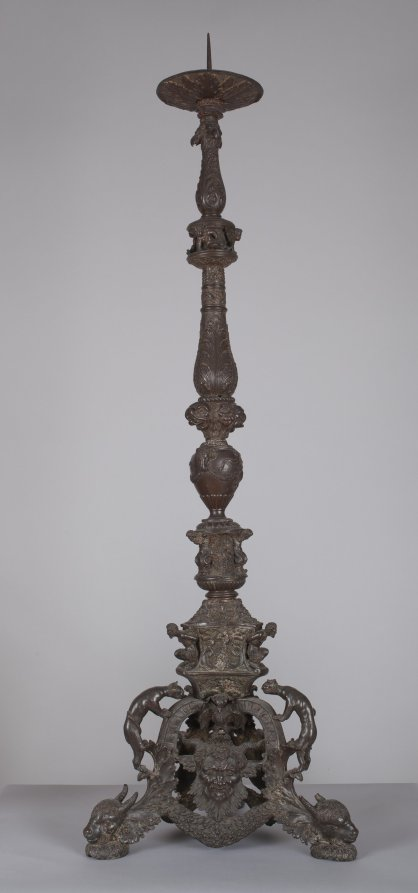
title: Paschal Candlestick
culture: Northern Italy, possibly Padua, 16th century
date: c. 1525–1550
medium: bronze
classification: Sculpture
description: In Roman Catholic practice, a large candlestick holds the Paschal Candle, blessed and lit for the first time on Easter eve, then used on significant occasions throughout the year. Despite its religious function, the decorations here are entirely secular-ranging from panthers and bound satyrs to the heads of raptors and goats. These elements derive from ancient Roman sculpture and were especially popular among intellectuals in northern Italy, who were actively exploring connections among pagan traditions, ancient philosophy, and Christianity.